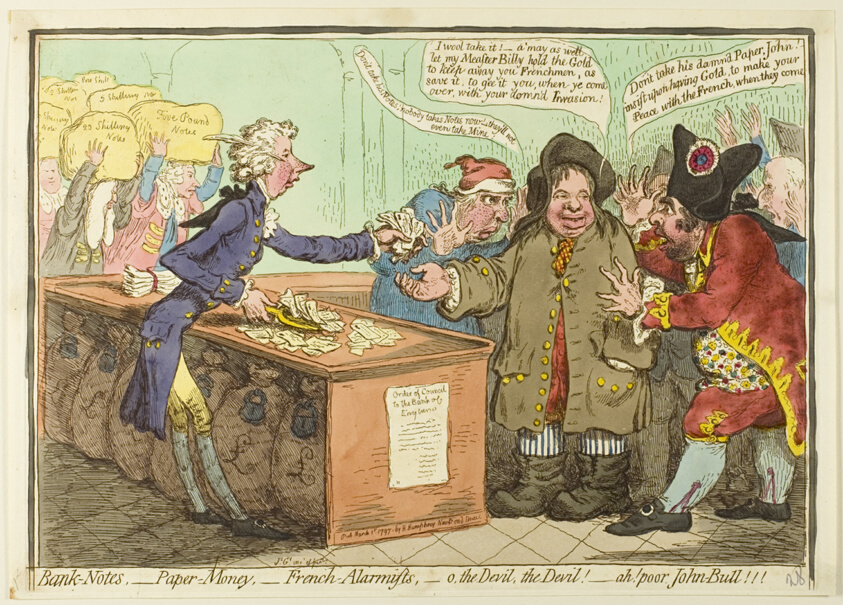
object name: Print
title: Bank-Notes, Paper-Money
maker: James Gillray (English, 1756-1815); published by Hannah Humphrey (English, c. 1745-1818)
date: published March 1, 1797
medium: Hand-colored etching on paper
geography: England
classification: etching; print; prints and drawing